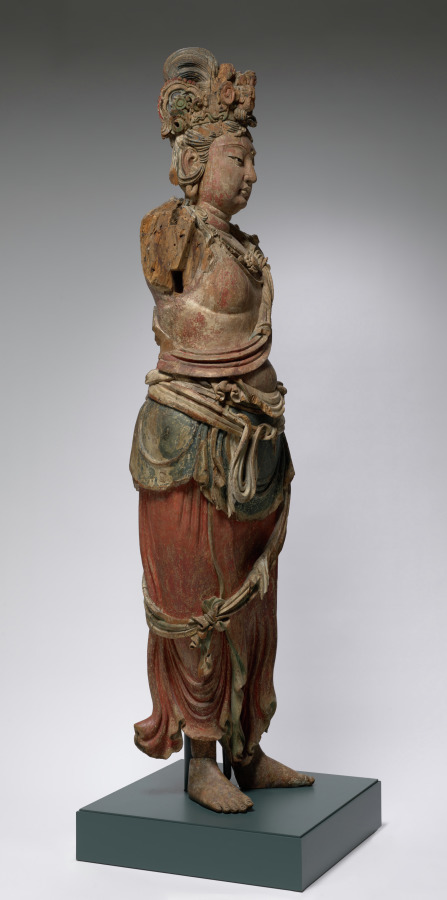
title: Eleven-Headed Guanyin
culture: China, late Northern Song dynasty (960-1127) - Jin dynasty (1115-1234)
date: 1100–1200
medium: wood with polychromy and cut gold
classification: Sculpture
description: The bodhisattva is an enlightened being dedicated to the spiritual awakening of all beings. The compassionate bodhisattva Guanyin, in a variety of manifestations, is probably the most popular deity of worship in Chinese Buddhism. In the Esoteric Buddhist form shown here, this standing Guanyin has a total of eleven heads, with smaller ones above the principal head. The uppermost head represents the Buddha Amitabha, to whom he is closely related. The eleven heads symbolize the Buddha’s steps on the path to enlightenment.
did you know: This Guanyin is carved from a single block of willow (genus Salix sp.).